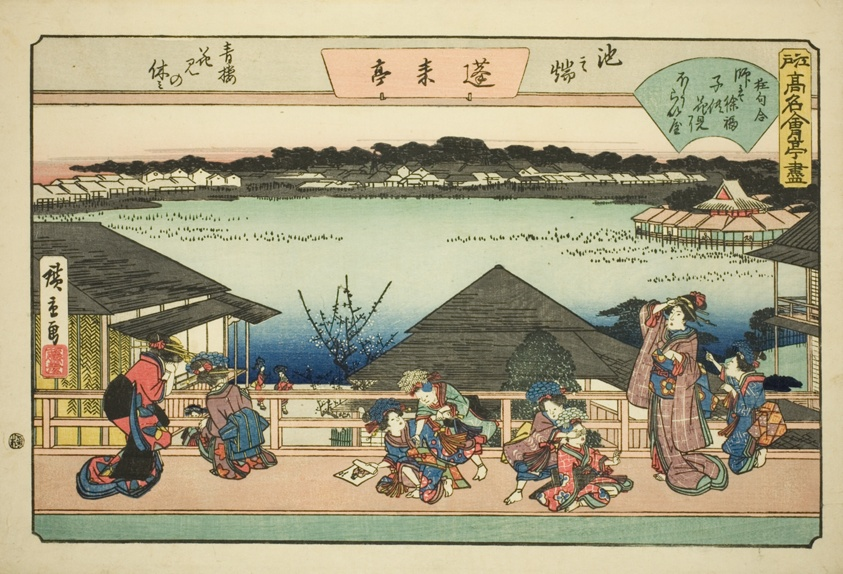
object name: Print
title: Courtesans Viewing Cherry Blossoms at Horaitei Restaurant in Ikenohata (Ikenohata seiro hanami no yasumi, Horaitei), from the series "Famous Restaurants of Edo (Edo komei kaitei zukushi)"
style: Japanese (culture or style)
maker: Utagawa Hiroshige 歌川 広重; Japanese, 1797-1858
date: c. 1838/40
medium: Color woodblock print; oban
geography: Japan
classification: woodblock print; print; asian art